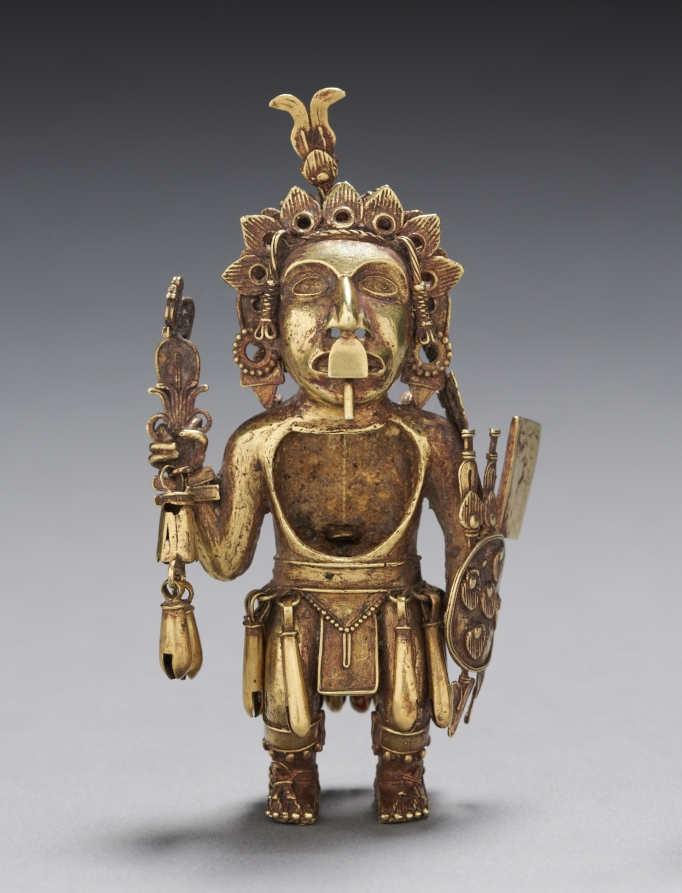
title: Figure of a Warrior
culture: Central Mexico, Tetzcoco?, Aztec, Post-Classic Period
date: after 1325 (thermoluminescence date of casting core, 1345–1575)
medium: gold-silver-copper alloy (cast)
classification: Metalwork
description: The elite status of this warrior, who holds a dartthrower, darts, and a shield, is revealed by the gold from which he is made as well as his jewelry and sandals. Military accomplishment was prized by the Aztecs, whose imperial expansion was fueled by ambition as well as their belief that they were chosen to uphold cosmic order through war. The purpose of the chest cavity is unclear; the figurine may have been worn as a pendant.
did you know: The calendar glyphs on the figure's back read "2 Rabbit, 3 Water."